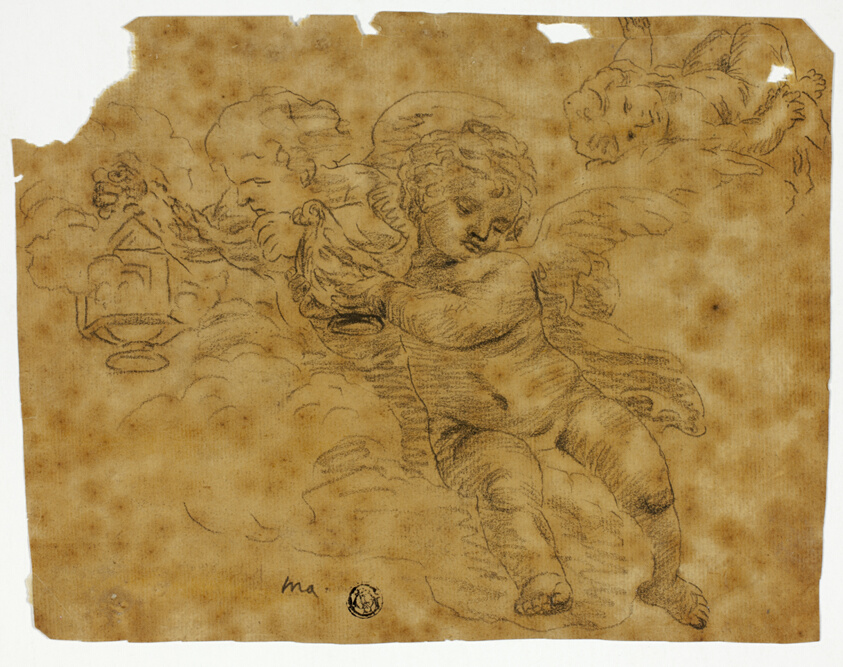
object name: Drawing and Watercolor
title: Cherubs with Censers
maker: Unknown Artist; European, n.d.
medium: Black crayon on tan laid paper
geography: Europe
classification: chalk; drawings (visual works); prints and drawing